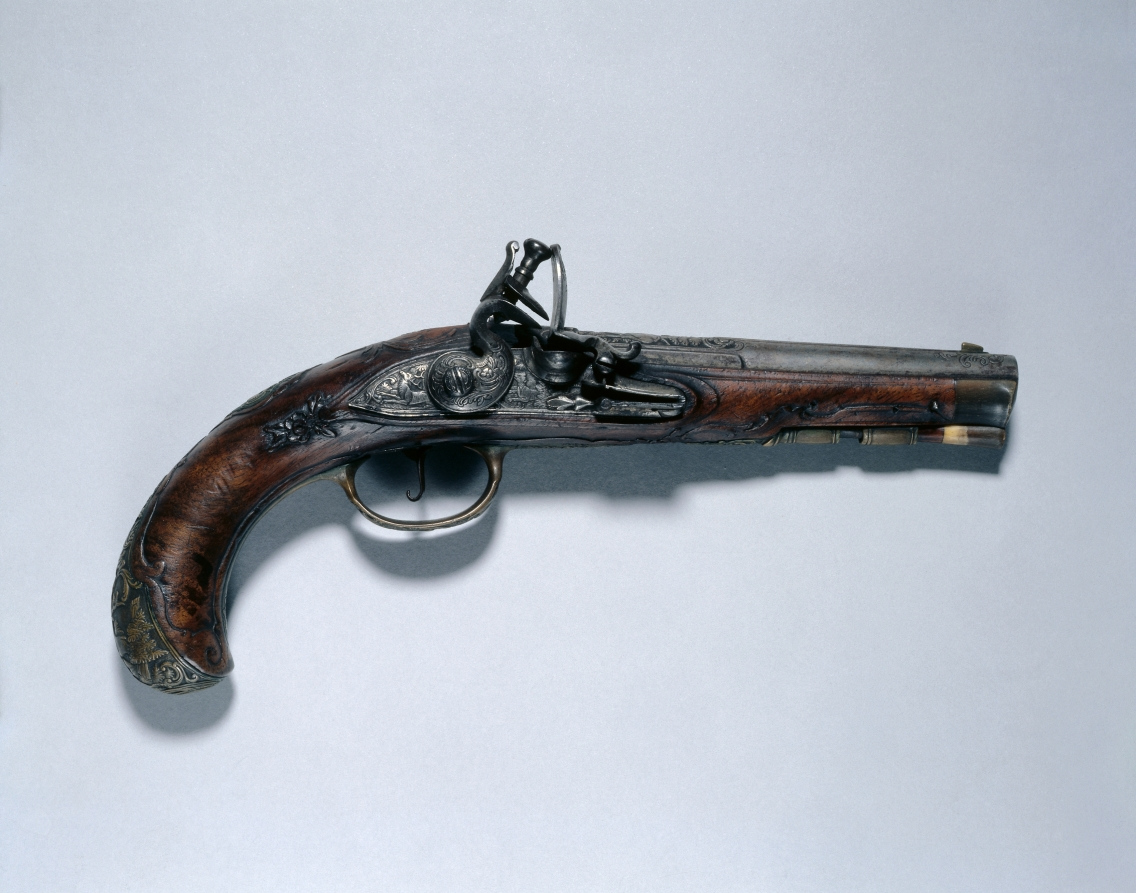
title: Flintlock Pistol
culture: Germany, Bavaria, Regensburg (?), 18th century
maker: Johann Andreas Kuchenreuter (German, 1716–1795)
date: c. 1750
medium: steel, walnut stock, brass mounts, barrel inlaid with gold, brass, and silver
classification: Arms and Armor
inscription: Barrel signed: Ioh And Kuchenruter